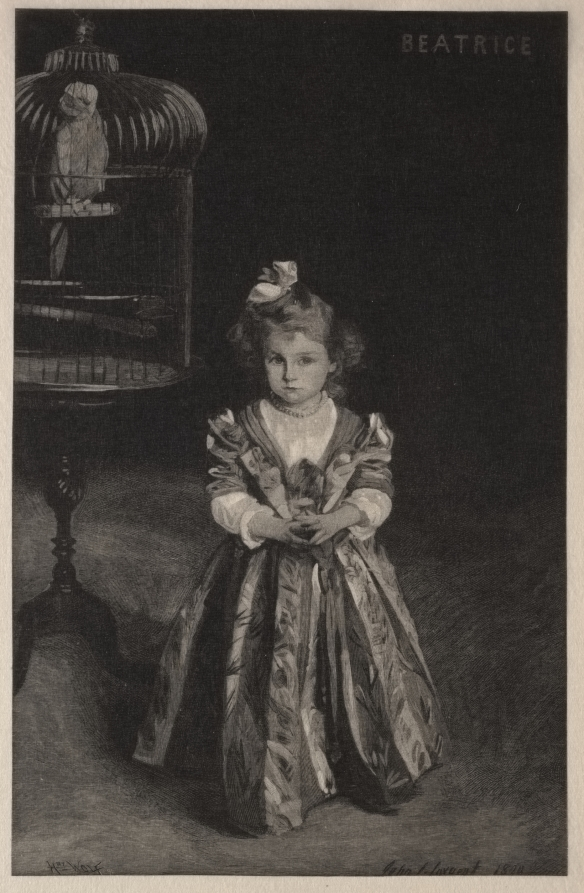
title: Beatrice Goelet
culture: America, late 19th Century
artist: Henry Wolf (American, 1852–1916)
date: 1891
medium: wood engraving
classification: Print